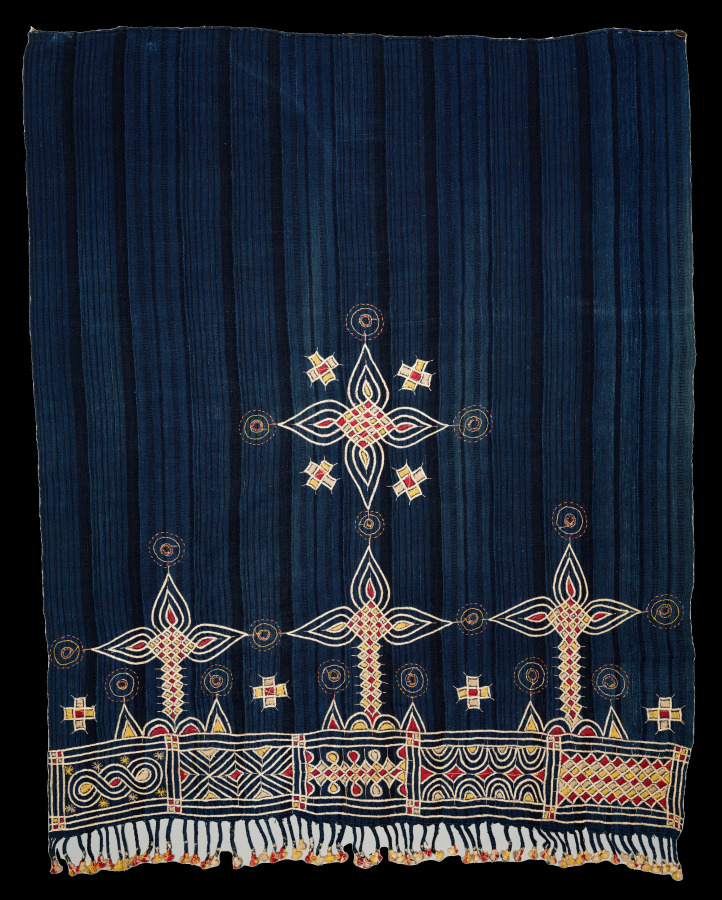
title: Woman's Shawl or Head Covering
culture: Africa, West Africa, Côte d’Ivoire, Hausa or Dyula-style, unknown makers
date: 1900–1925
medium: Cotton, silk, indigo and other natural dyes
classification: Textile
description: A woman would have worn this embroidered textile on her head or her shoulders, with the motifs on her back. It was likely adorned by itinerant Hausa embroiderers, whose knowledge as Koranic scholars inflected their work with a symbolic and calligraphic style. The large, almond-shaped forms may represent lotus leaves or may have links to Islamic talismanic motifs or amulets (hatumere).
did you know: Only six examples of this rare textile are known.